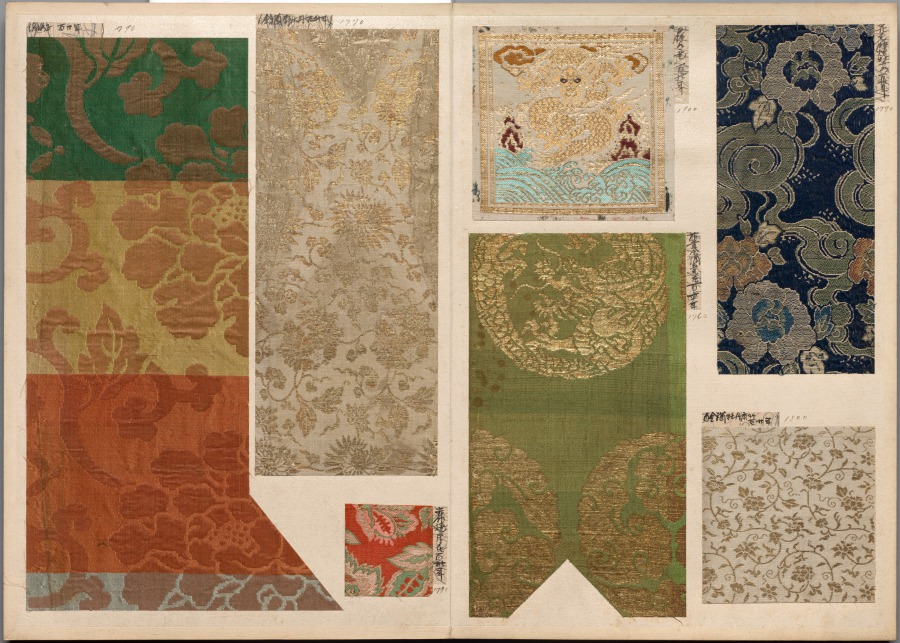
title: Album of Textile Samples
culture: Japan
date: 1790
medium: silk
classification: Textile